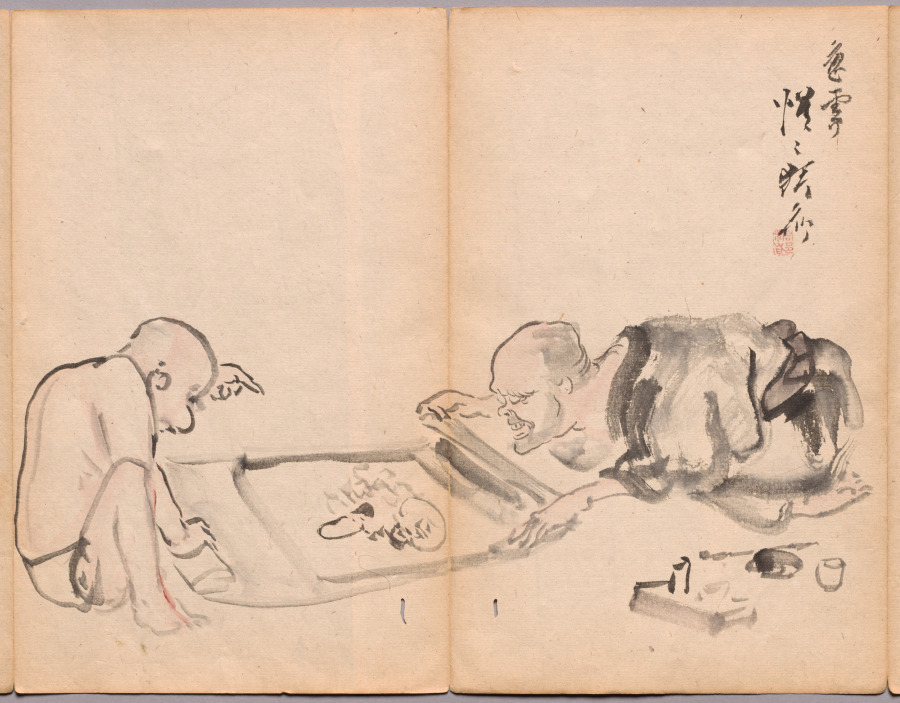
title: Looking at a Painting from Sketch Album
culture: Japan, Edo period (1615–1868) to Meiji period (1868–1912)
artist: Kawanabe Kyōsai (Japanese, 1831–1889)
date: mid- to late 1800s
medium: Accordion-style book of 26 double-leaves; ink and color on paper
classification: Bound Volume